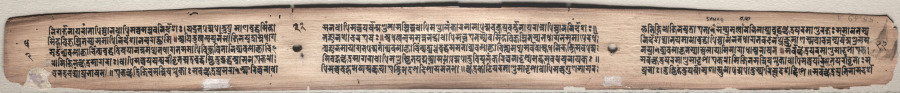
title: Text, folio 22 (verso) from a Gandavyuha-sutra (Scripture of the Supreme Array)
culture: Nepal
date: 1000–1100s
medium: ink on palm leaves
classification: Painting